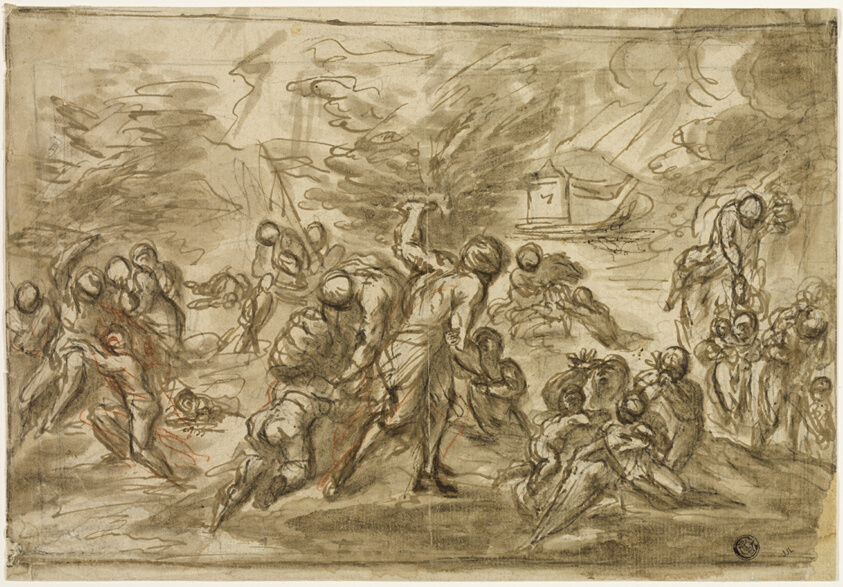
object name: Drawing and Watercolor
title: The Deluge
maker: Attributed to Andrea dei Michieli; Italian, c. 1542-1617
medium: Pen and brown ink with brush and brown wash, with touches of red and black chalk, on ivory laid paper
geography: Italy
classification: ink with wash; drawings (visual works); prints and drawing